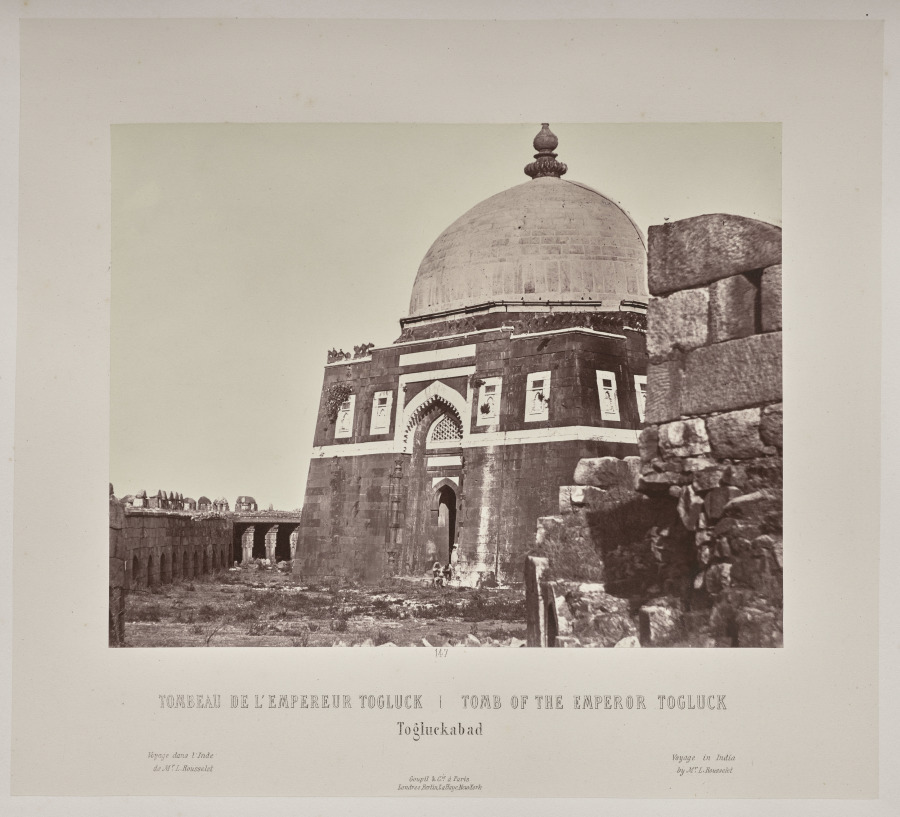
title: Tomb of the Emperor Togluck, Togluckabad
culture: France, 19th century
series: India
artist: Louis-Théophile Marie Rousselet (French, 1845–1929)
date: 1865–68, published 1869–70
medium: Albumen print from glass plate negative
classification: Photograph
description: Concerned that his drawings did not do justice to the splendor of India’s monuments, Rousselet learned photography in India that year, a remarkable accomplishment. He proved to be a talented photographer with a sophisticated sense of composition. The scenes in this volume sweep across sites of Sultanate, Rajput, and Mughal power in northern India, from the sacred Hindu city of Varanasi on the Ganges River to Alwar in Rajasthan. Also included are several scenes of industry and portraits of Indian rulers.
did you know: Louis Rousselet described himself as a “scientific traveler” when he went to India alone at age 18 in 1863 and stayed into 1868.